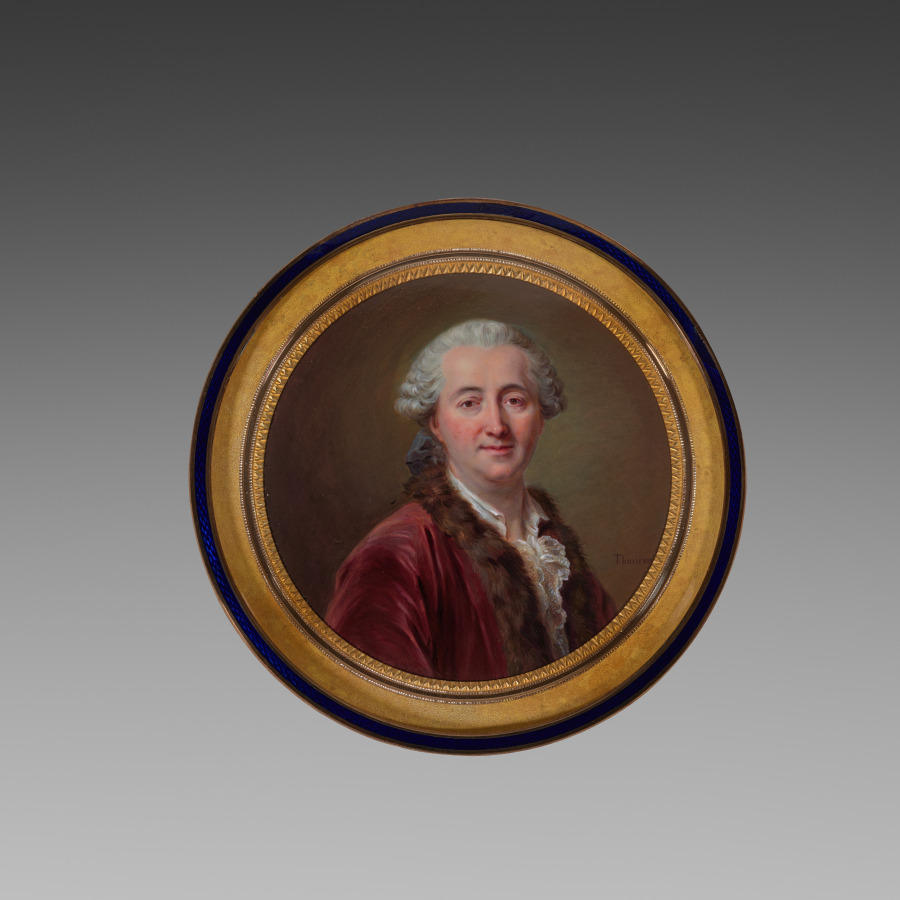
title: Portrait of Étienne François, comte de Stainville, duc de Choiseul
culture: Switzerland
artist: Jacques Thouron (Swiss, 1740–1789)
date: mid to late 1700s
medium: enamel in a gilt metal and enamel frame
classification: Portrait Miniature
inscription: signed right: Thouron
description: Unlike fragile portrait miniatures painted in watercolor on vellum or ivory, which are prone to cracking, fading, and flaking, enamels are resilient, impervious to the effects of light, and retain their striking original colors over time. Partly for this reason enamel was considered ideal for reproducing famous paintings and treasured portraits in a reduced and luminous form. The complicated and labor-intensive process of enameling required the artist to fire numerous layers of colored metal oxide at different temperatures. This process made it difficult to produce a faithful portrait likeness, though masters of the medium like Jacques Thouron were able create portraits of remarkable subtlety imbued with the sitter's personality.